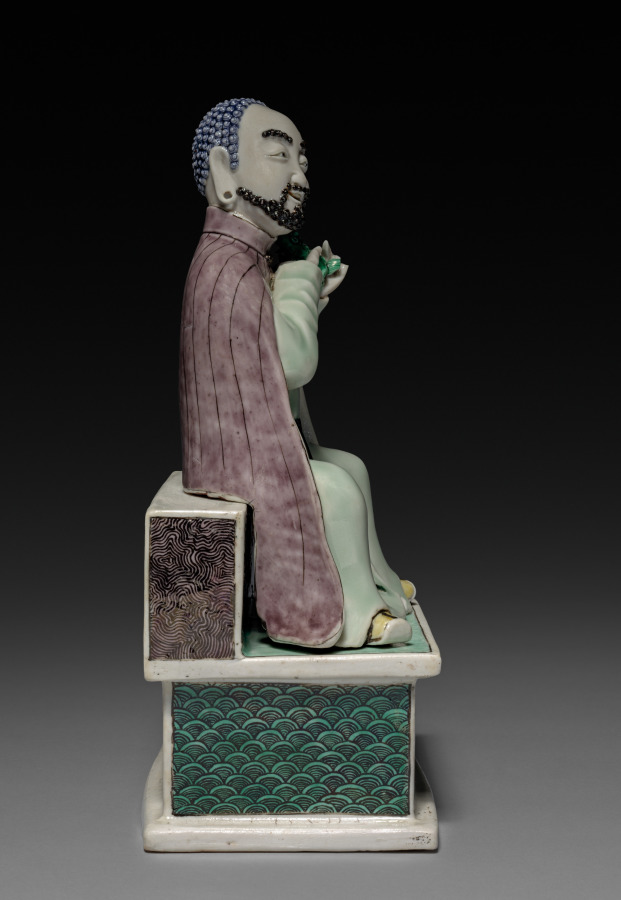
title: Lohan (Arhat) Holding a Fu Dog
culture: China, Jiangxi province, Jingdezhen kilns, Qing dynasty (1644-1911), Kangxi reign (1662-1722)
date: 1662–1722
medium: porcelain with famille verte overglaze enamel decoration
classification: Ceramic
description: Lohan are disciples of Buddha with supernatural powers and eccentric behaviors. This lohan is holding the fu-dog, symbolizing good luck, while its mate is holding the peach of longevity (shoutao). With carefree smiles and playful gestures, these two figures embody a humorous attitude and a detachment from worldly affairs. This pair of porcelain figures was perhaps part of a house altar set or a decorative item in a household.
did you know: This lohan and its pair embody a humorous attitude and playful behavior, indifference to danger and miracles, and hence a detachment from worldly affairs.